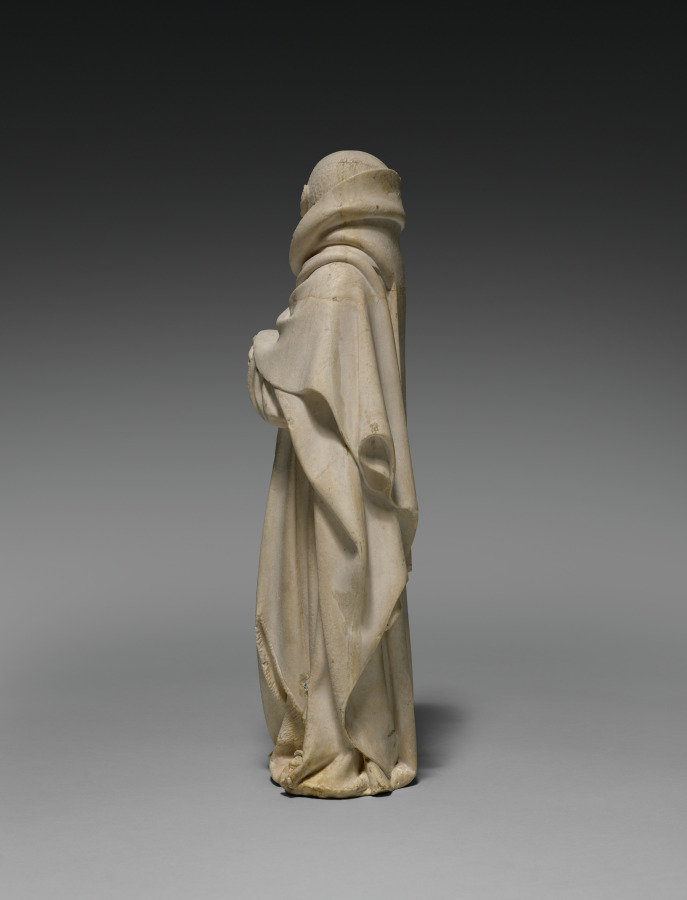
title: Mourner from the Tomb of Philip the Bold, Duke of Burgundy (1364–1404)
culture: Netherlands, active Dijon, 15th century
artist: Claus de Werve (Netherlandish, 1380–1439)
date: 1404–10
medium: vizille alabaster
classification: Sculpture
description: This figure comes from the tomb of Duke Philip the Bold from the church of Champmol near Dijon (Burgundy, France). Philip, who founded the monastery and designated it as his burial place, hired the best artists, many of whom came from the Netherlands. While the commission was given in 1381, the work was not completed until 1410, six years after the duke’s death. This mourner is unusual for the time because it is not carved as a static low relief on the pedestal of the tomb but interact with the viewers and their fellow procession members. The lifelike quality of the figure is due in large part to the alabaster. Its softness allowed artists to carve details into the material, and the transparent, milky white stone could also be polished to a high gloss.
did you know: The use of alabaster in the late Middle Ages began in the 1300s with court art in the circles of French kings, especially in the field of funerary sculpture.